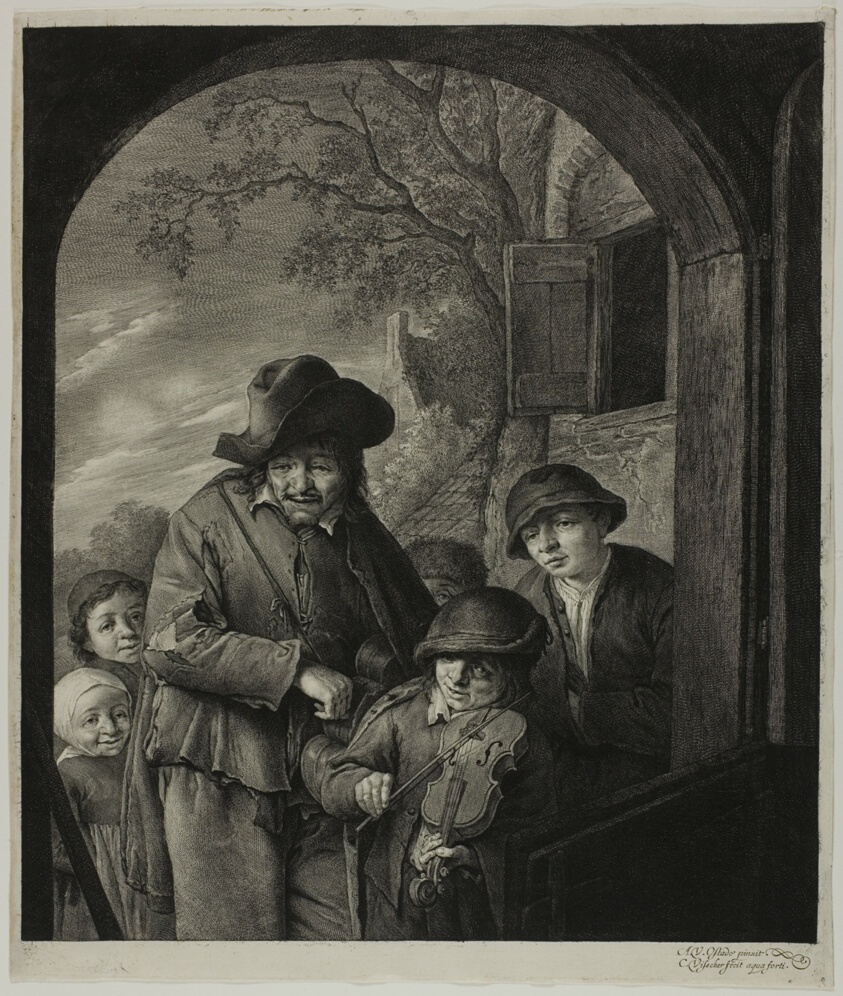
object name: Print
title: The Hurdy-Gurdy Player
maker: Cornelis Visscher (Dutch, c. 1629-1658); after Adriaen van Ostade (Dutch, 1610-1685)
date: c. 1649-58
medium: Etching and engraving on paper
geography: Holland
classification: engraving; print; prints and drawing